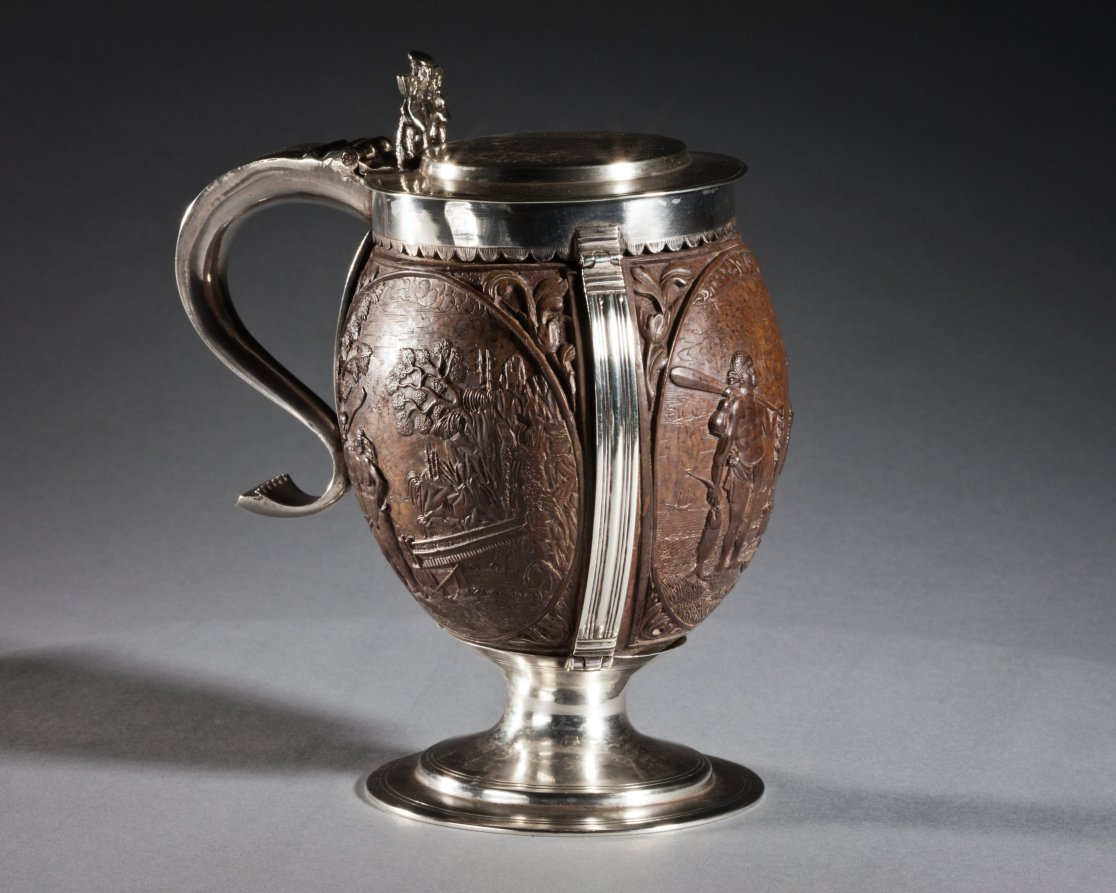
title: Coconut Cup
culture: carved coconut, probably The Netherlands; silver mount, probably England, 17th century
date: c. 1630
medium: carved coconut in silver mount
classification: Metalwork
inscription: top lid has engraved coat-of-arms, underside of lid has inscription: George Lewis TIVERTON Feby, 1st 1760.